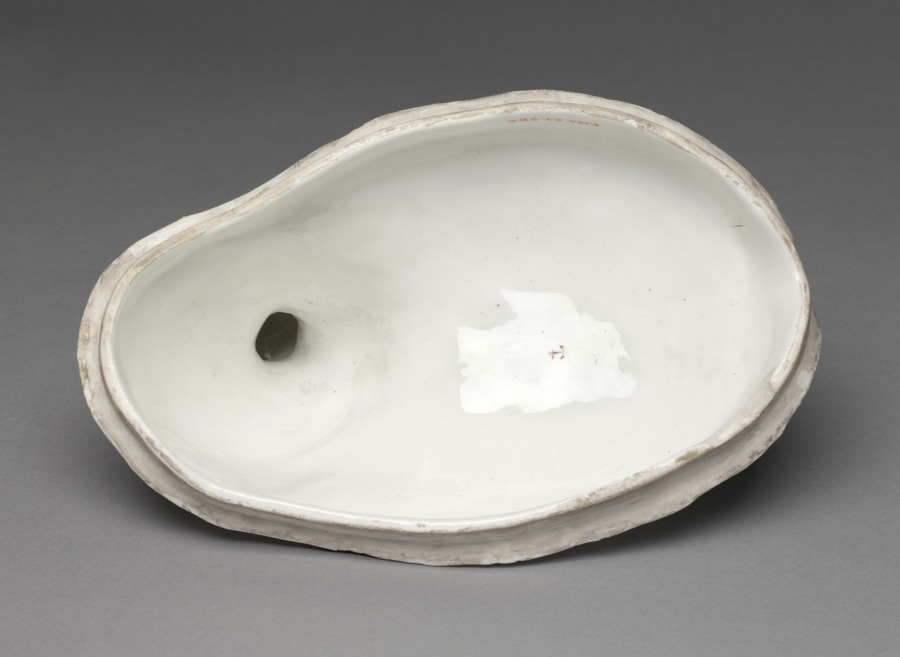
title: Cover for a Hen and Chicks Tureen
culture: England, London, Chelsea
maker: Chelsea Porcelain Factory (Britain, London, 1745–84)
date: c. 1755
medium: porcelain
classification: Ceramic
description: The ceramic factory at Chelsea, located along the river Thames in western London, was Britain’s most renowned factory of decorative porcelain in the mid-1700s. Large tureens in the form of chickens or rabbits appealed to wealthy aristocrats, who took great care in developing specimen animal and poultry breeds on their country estates. The design for this particular tureen was taken from a popular seventeenth-century print by Francis Barlow depicting a farmyard.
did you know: See cover record.